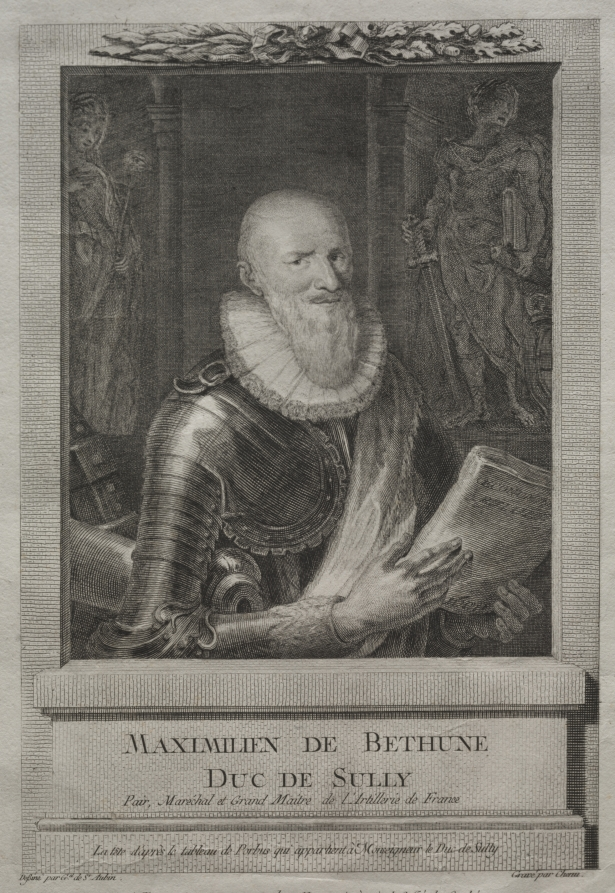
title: Maximilien de Bethune, Duc de Sully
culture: France, 18th century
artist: Pierre Chenu (French, 1718?-1795)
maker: after Gabriel de Saint-Aubin (French, 1724–1780)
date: 1767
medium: engraving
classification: Print